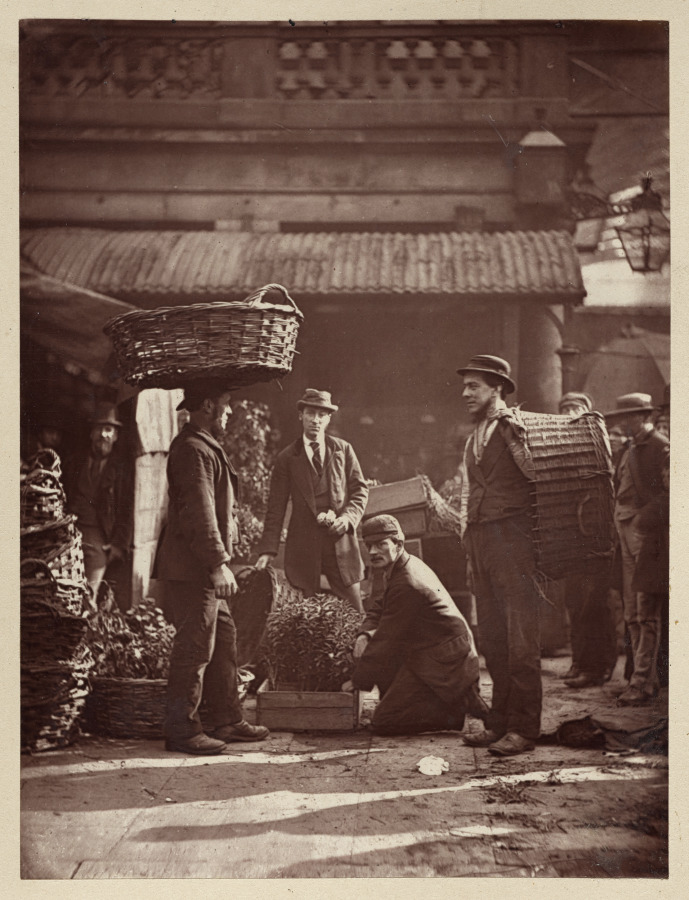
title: Covent Garden Labourers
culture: England, 19th century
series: Street Life in London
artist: John Thomson (Scottish, 1837–1921)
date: 1877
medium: woodburytype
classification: Photograph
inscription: Stamped in red ink on recto of mount: “COVENT GARDEN LABOURERS.”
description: Covent Garden workers, whose day started before 5 a.m., were divided into job-workers or odd-men—who were paid for each parcel they delivered and thus received little income in the off-seasons—and a much smaller group of salaried workers who were paid year-round to create arrangements and stock and help run the stalls.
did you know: The wholesale flower market at Covent Garden contained over 500 stands that employed around 4,000 men as growers and deliverymen.